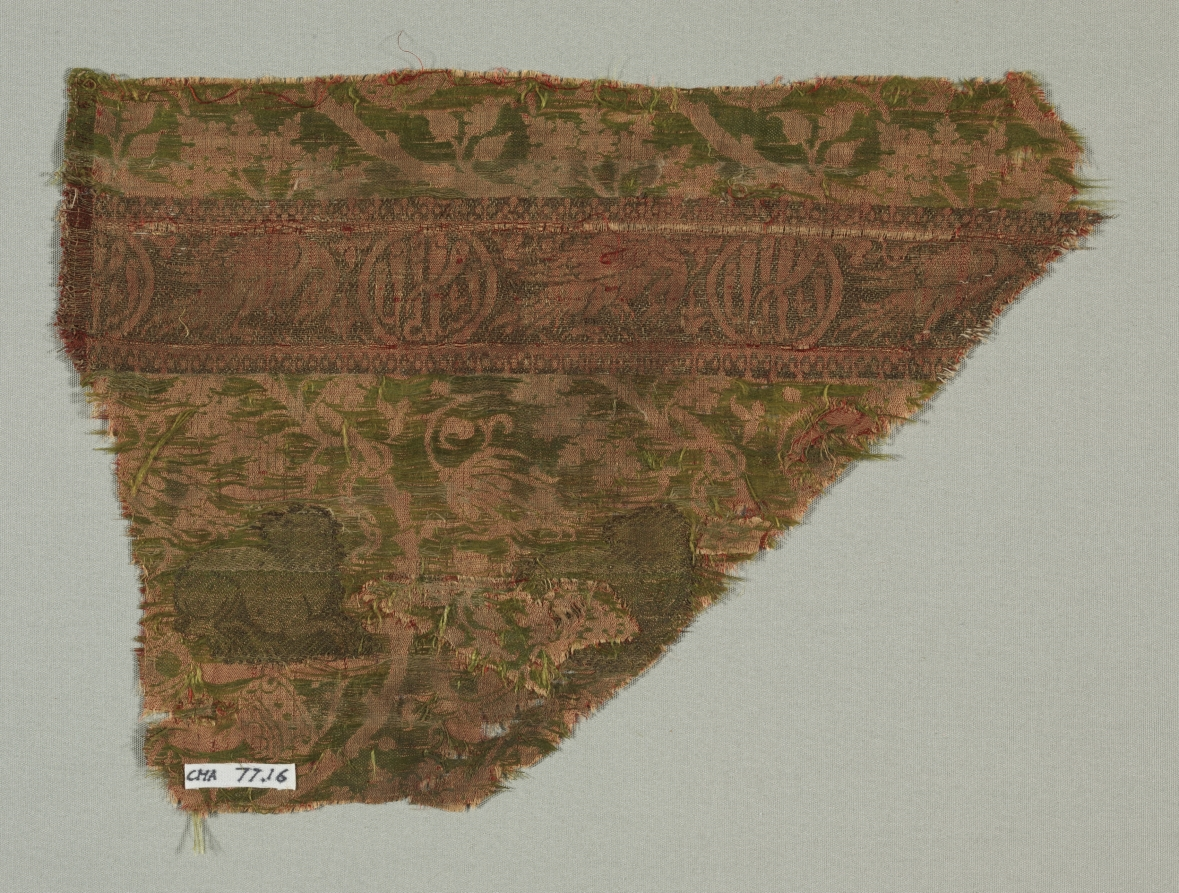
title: Silk Fragment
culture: Italy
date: 1350–99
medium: Silk and gold thread: lampas weave, brocaded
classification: Textile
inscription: oval cartouches contain arabic in distorted Naskhi: "al-sultan."